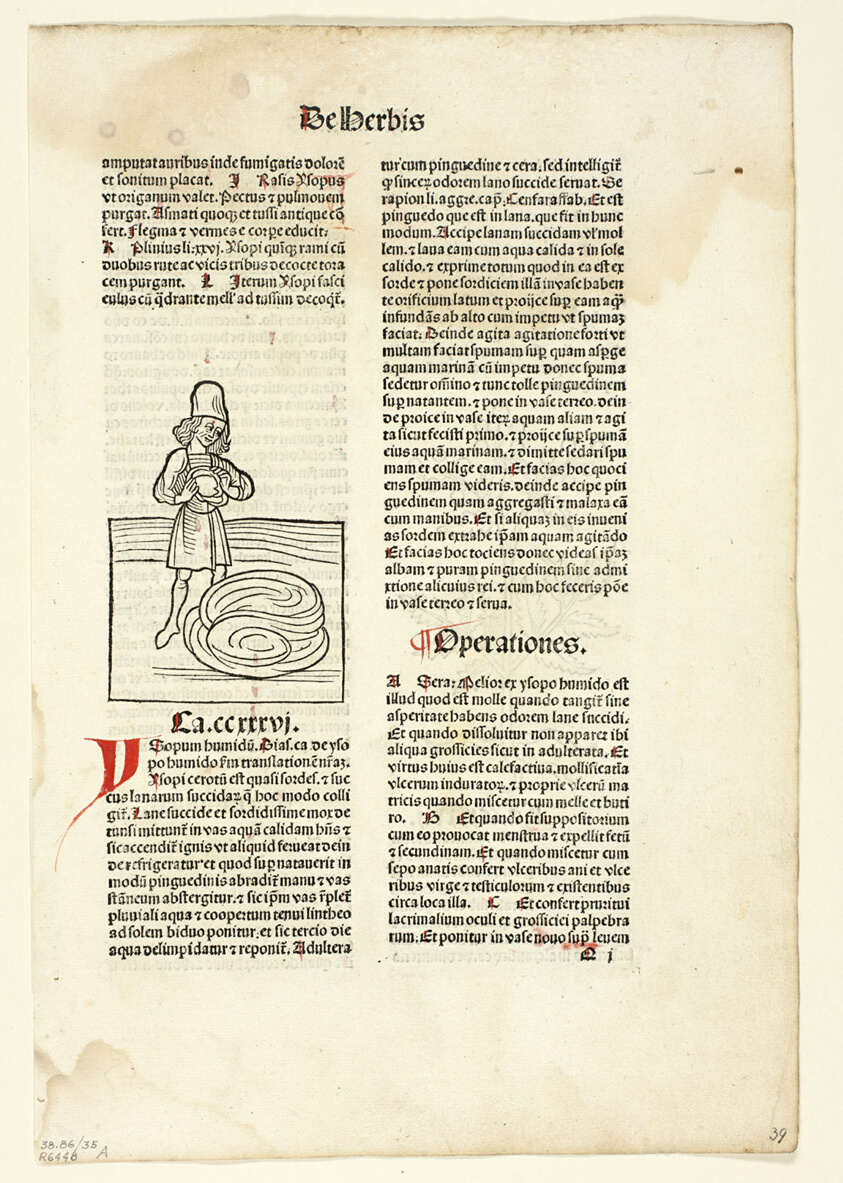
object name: Print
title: Man purging fluid from lungs (recto) and Plant for abdominal pain (verso) from Hortus Sanitatis (Garden of Health), Plate 35 from Woodcuts from Books of the 15th Century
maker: Unknown Artist (Mainz, late 15th century); printed and published by Jakob Meydenbach (German, active 1491–c. 1495); portfolio text by Wilhelm Ludwig Schreiber (German, 1855–1932)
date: 1491, portfolio assembled 1929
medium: Woodcut and letterpress in black (recto and verso) on buff laid paper, tipped onto cream wove paper mat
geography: Germany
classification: woodcut; print; prints and drawing